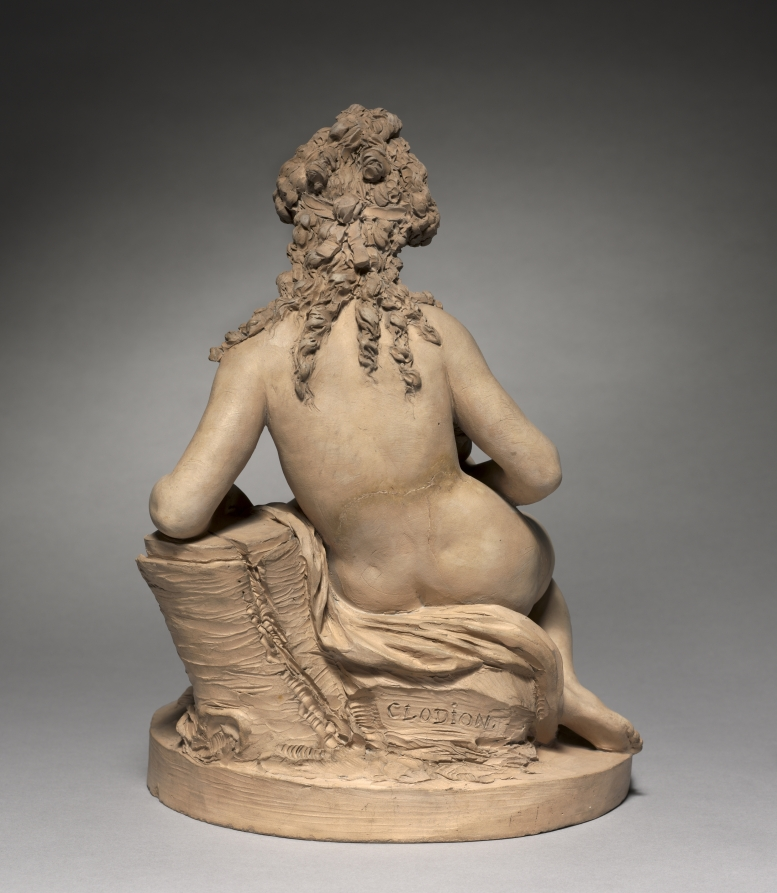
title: Young Woman and Child at Play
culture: France, 18th century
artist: follower of Clodion (French, 1738–1814)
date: 1780s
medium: terracotta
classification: Sculpture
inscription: inscribed: Clodion.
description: The French sculptor Claude Michel, called Clodion (1738–1814), constructed much of his work in terracotta. After firing, the unglazed color of the clay can vary widely, so each of Clodion's works in this medium has a slightly different hue, in this case a smooth reddish gray. Clodion depicts a mother nursing her newborn with painstaking attention to detail, from the tendrils of hair that cascade gracefully down to the mother's shoulders to the brilliant bouquet at the pair's feet.